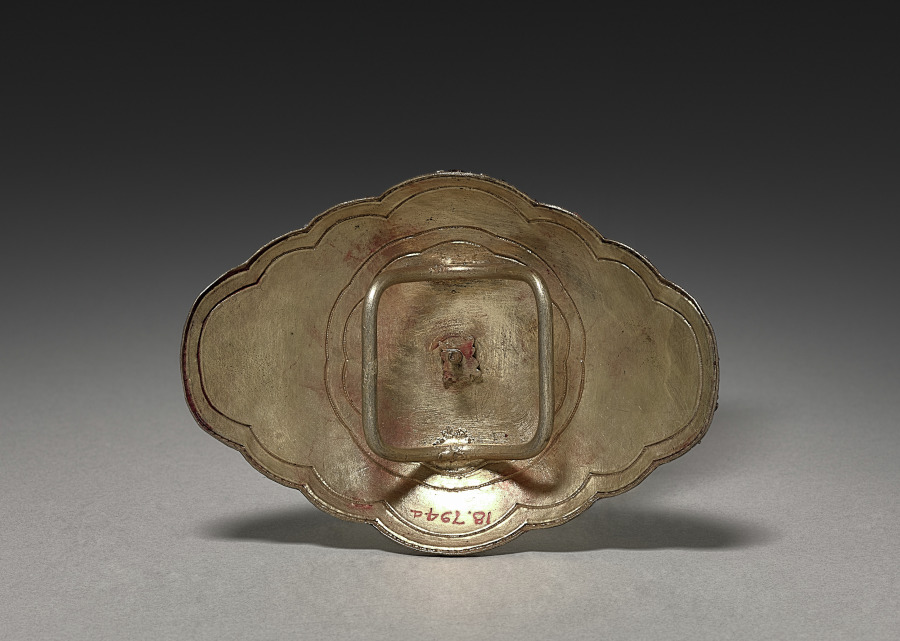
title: Belt Buckle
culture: Siam, 19th century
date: 1800s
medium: brass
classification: Jewelry